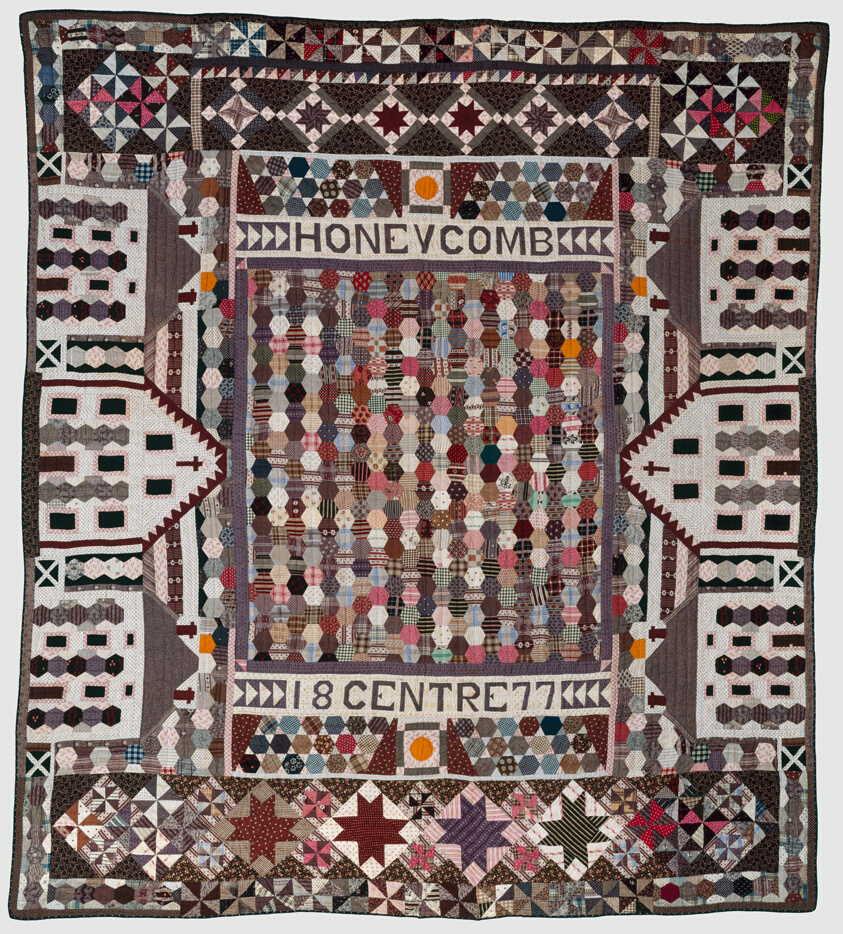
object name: Textile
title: Honeycomb Centre Quilt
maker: United States, Michigan, Union City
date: 1877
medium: Cotton and silk, plain weaves, some roller printed; pieced; appliquéd with cotton and wool, plain weave wrapped cardboard; edged and backed with cotton, plain weave; roller printed; quilted with cotton thread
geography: Michigan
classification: textile; needlework - quilt